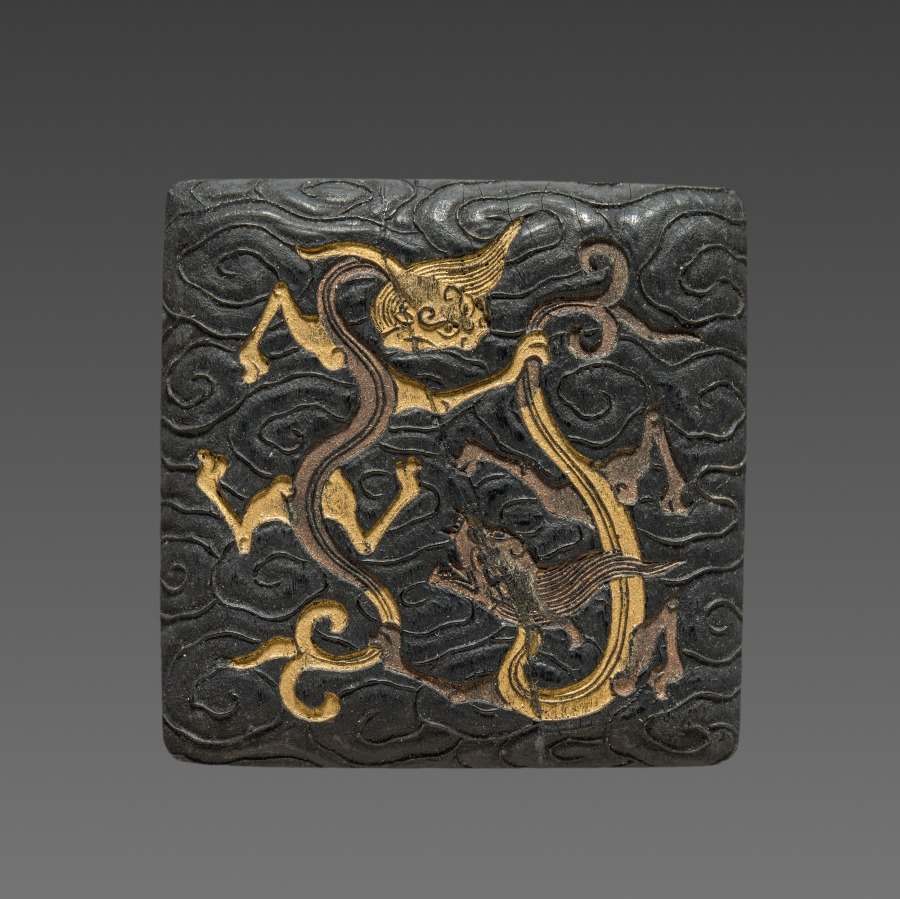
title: Ink Cake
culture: China, Qing dynasty (1644-1911)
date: 19th Century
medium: ink cake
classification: Miscellaneous